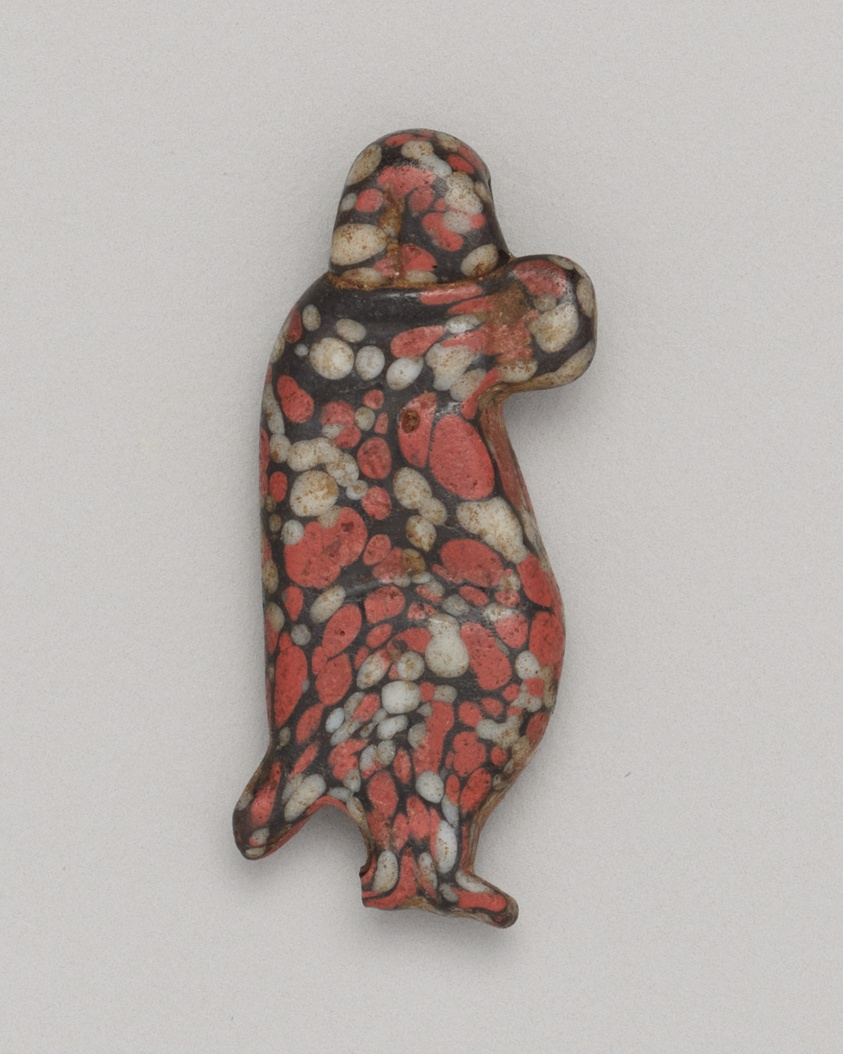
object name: Costume and Accessories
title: Amulet of Taweret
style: new kingdom, egyptian, ancient, eighteenth dynasty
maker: Egyptian; Probably Tell el-Amarna, Egypt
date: New Kingdom, Dynasty 18, reign of Akhenaten (about 1352–1336 BCE)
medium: Glass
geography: Egypt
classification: amulet; glass; jewelry; ancient art; costume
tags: goddesses